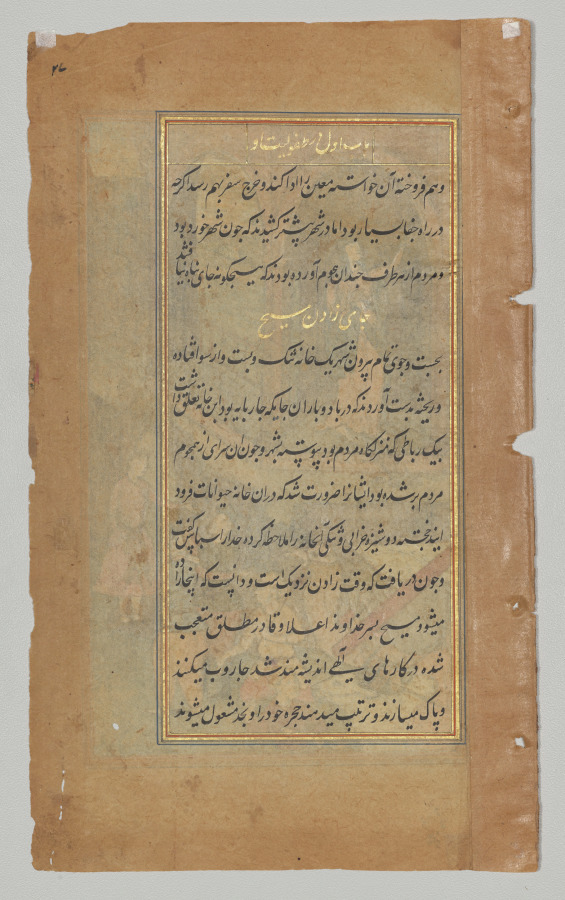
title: The place of Jesus’s birth (folio 25 recto), from a Mirror of Holiness (Mir’at al-quds) of Father Jerome Xavier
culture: Mughal India, Allahabad, made for Prince Salim (1569–1627)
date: 1602–4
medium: Gum tempera, ink, and gold on paper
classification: Manuscript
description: Instead of a stable, the artist has interpreted the place of Jesus’s birth as an abandoned ruin. Mary is cleaning it with a peacock-feather whisk, while Joseph negotiates with a man dressed in full Mughal attire at the doorway. The camel is laden with belongings and an Indian-style bed.